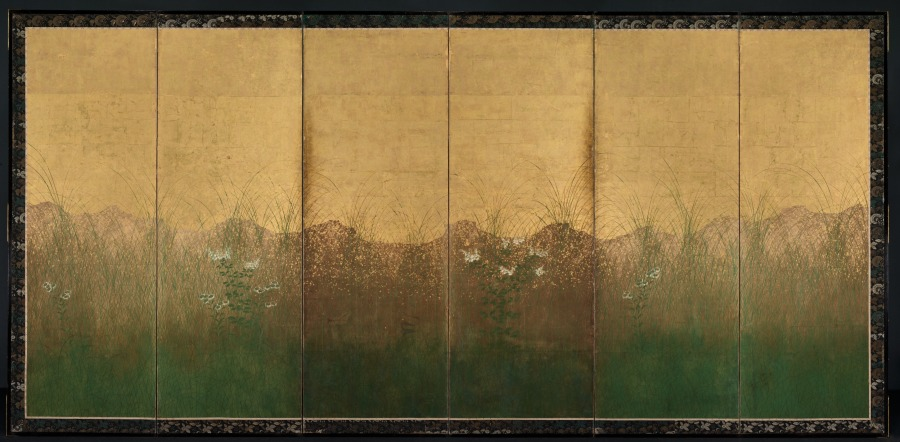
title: Autumn Evening with Full Moon on Musashino Plain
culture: Japan, Edo period (1615–1868)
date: early 1600s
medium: One of a pair of six-fold screens; ink, color, and gold and silver foil on gilded paper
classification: Painting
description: Tall grasses and autumn flowers reach out of thick green undergrowth in this depiction of the plain of Musashi, a site famous from classical Japanese poetry. A silver disc, now tarnished, represents the full moon. Flecks of cut-gold foil in the sky evoke the day’s passage into night. Once a wilderness with a vast horizon, Musashi is now densely populated.